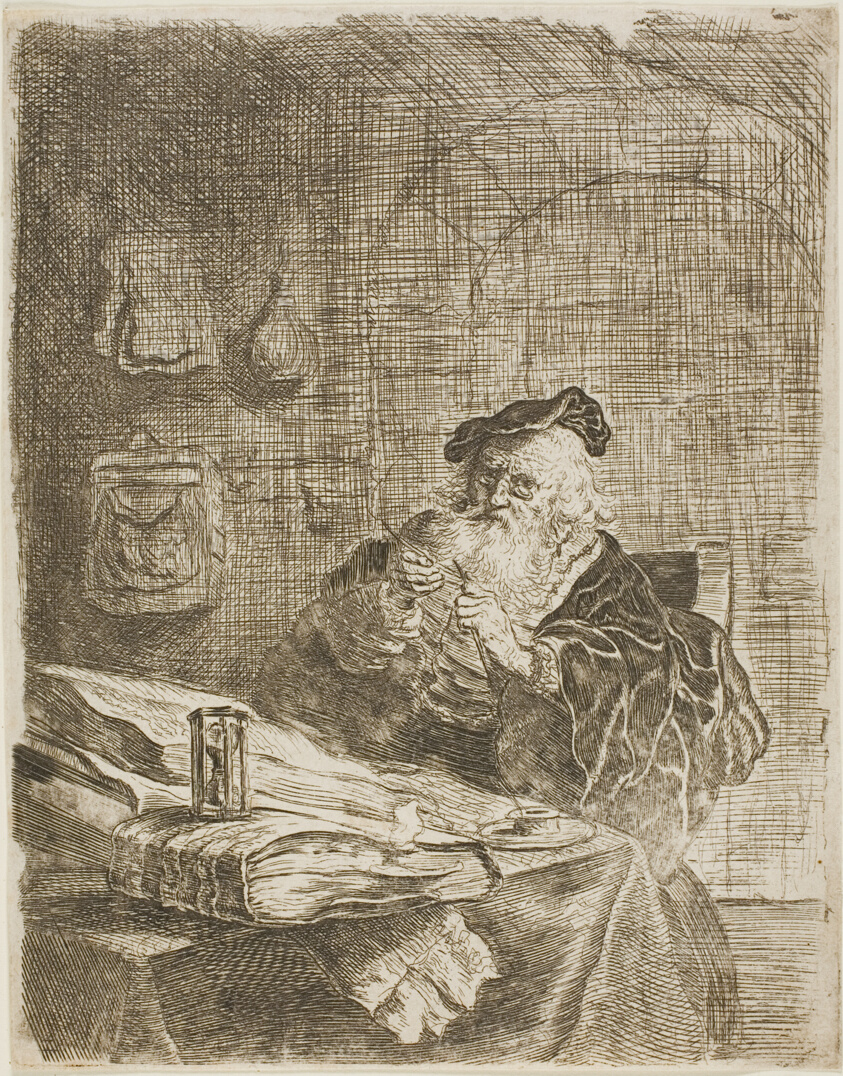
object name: Print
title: The Scribe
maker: Salomon de Koninck (Dutch, 1609-1668)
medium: Etching on ivory paper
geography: Holland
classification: etching; print; prints and drawing